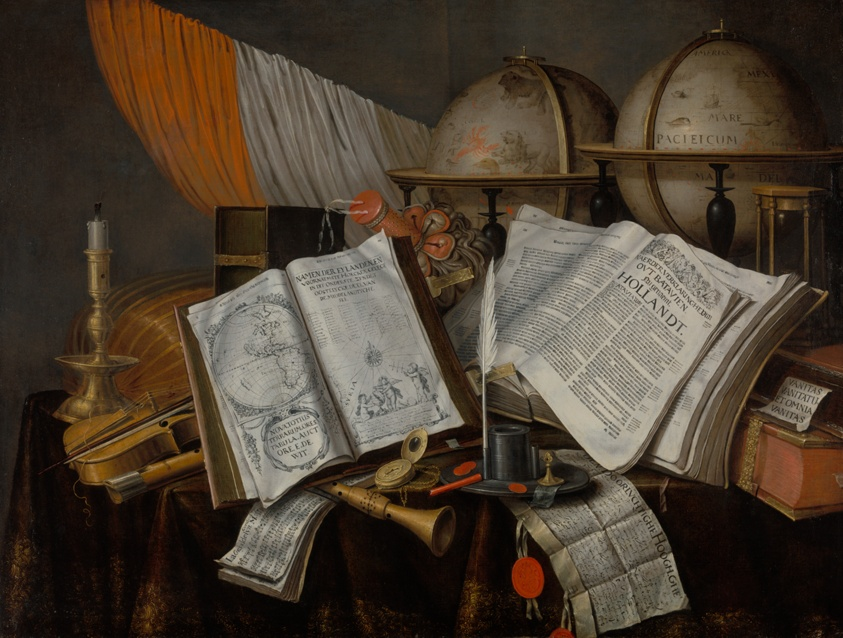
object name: Painting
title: A Vanitas Still Life with a Flag, Candlestick, Musical Instruments, Books, Writing Paraphernalia, Globes and Hourglass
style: 17th Century, Baroque, dutch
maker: Edwaert Collier (Dutch, 1642–1708)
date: 1662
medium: Oil on canvas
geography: Holland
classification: painting; european painting; paint; still life; oil on canvas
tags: still life, feathers, candleholder, flags, books, globes, maps